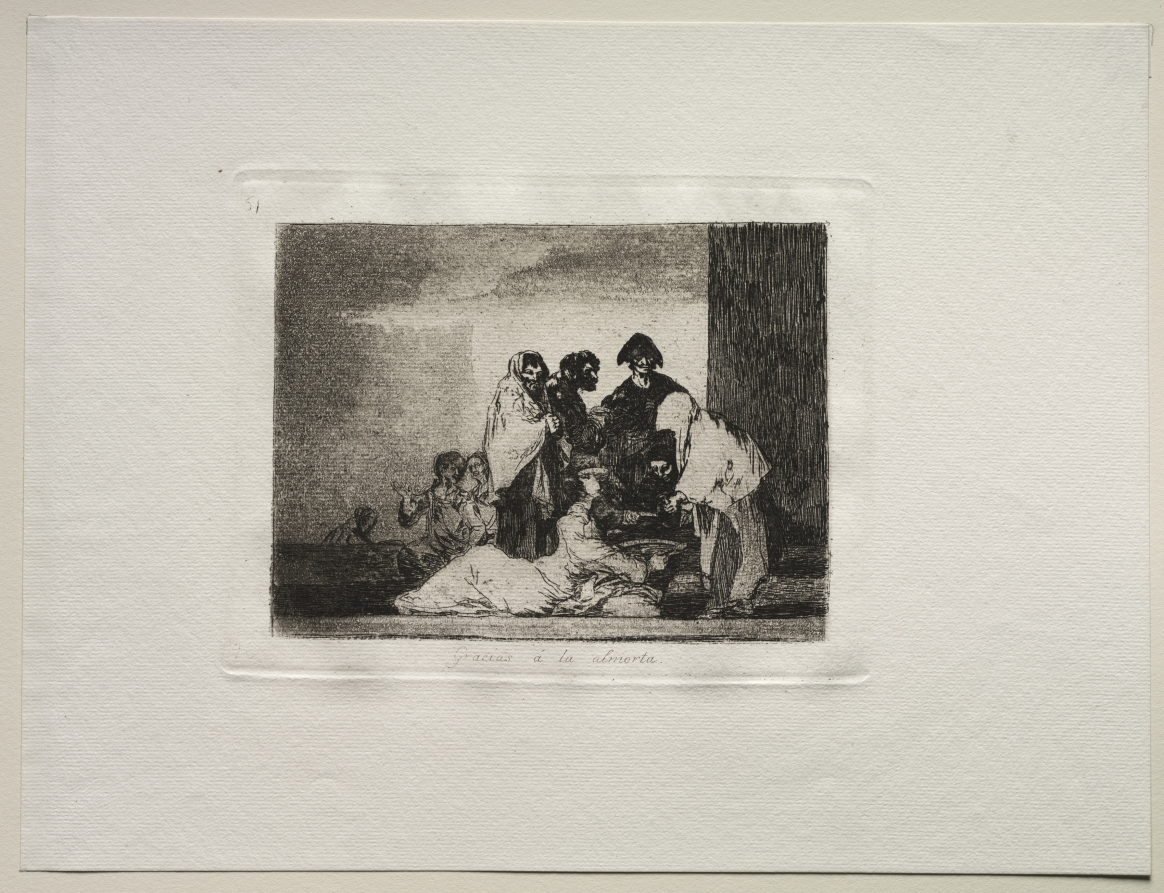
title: The Horrors of War: Thanks To The Millet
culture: Spain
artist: Francisco de Goya (Spanish, 1746–1828)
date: c. 1810–20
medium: etching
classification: Print